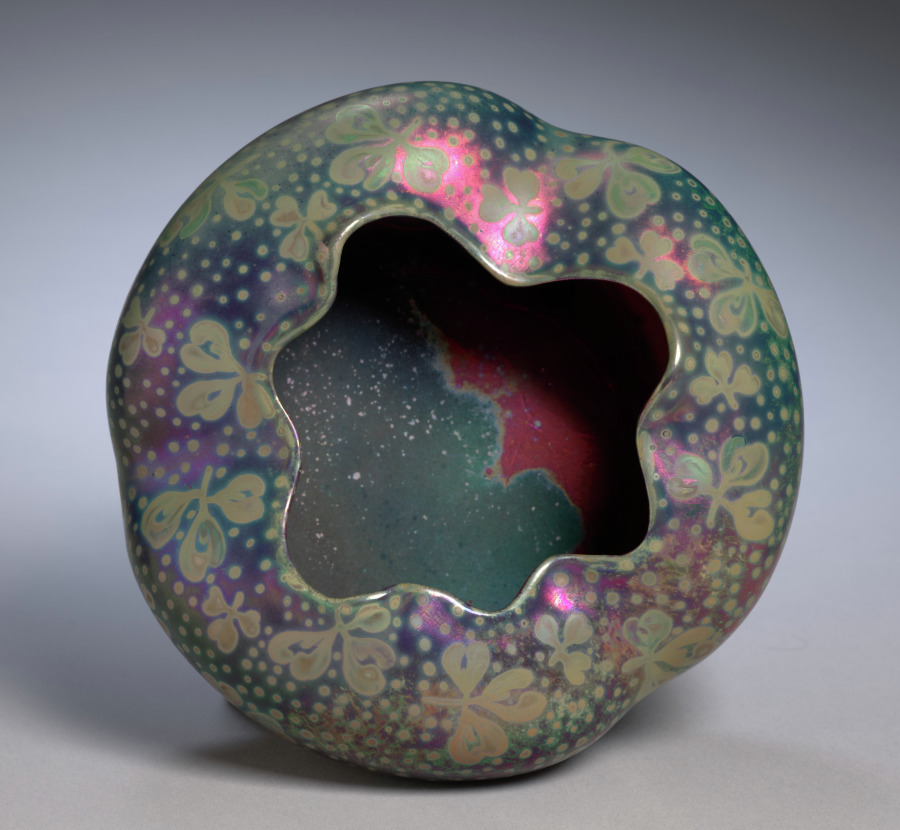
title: Bowl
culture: America, Ohio, Zanesville, early 20th Century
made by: Weller Pottery (American)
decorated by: Jacques Sicard (French, 1865–1923)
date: early 1900s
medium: earthenware decorated with lustre glazes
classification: Ceramic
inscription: inscribed on side near bottom: "SICA(?)D WELLER." Incised at center of bottom: 28.